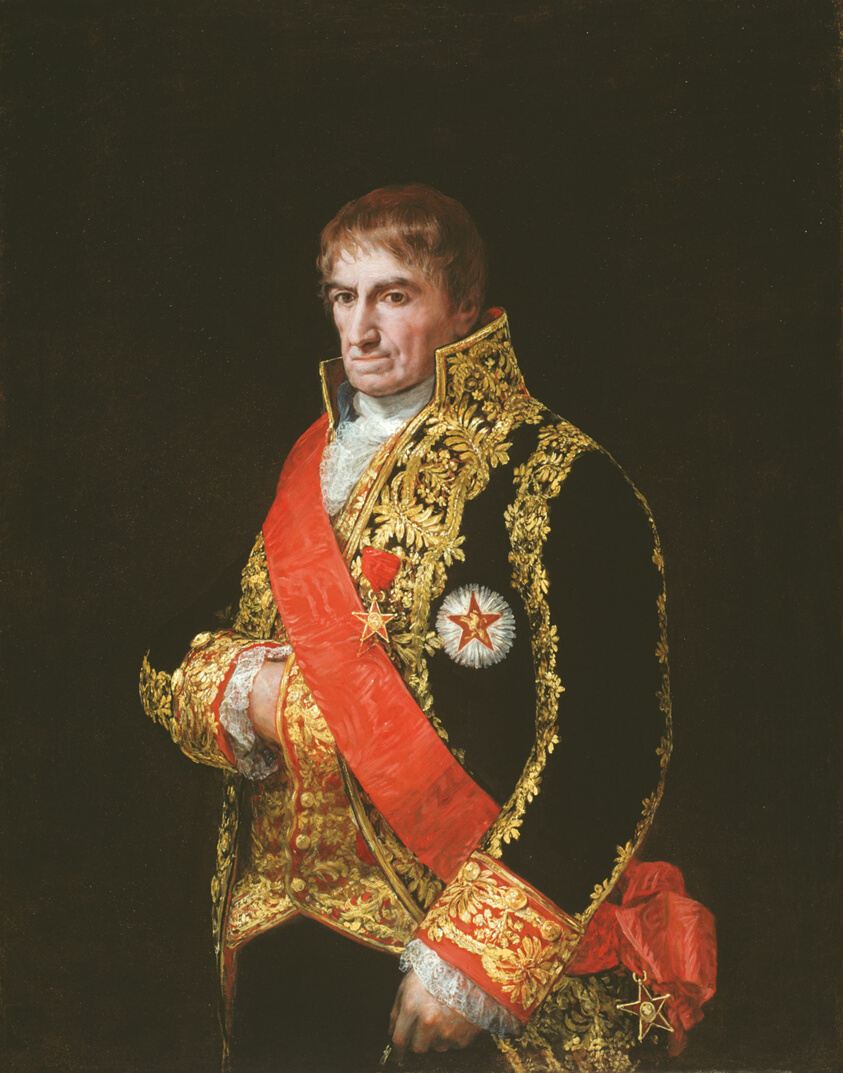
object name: Painting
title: Portrait of General José Manuel Romero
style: nineteenth century, 19th century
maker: Francisco José de Goya y Lucientes (Spanish, 1746–1828)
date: c. 1810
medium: Oil on canvas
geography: Spain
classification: painting; oil on canvas; oil paintings (visual works); paint; portrait; spanish; european painting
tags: portraits: Spanish subject, decoration, generals, gold (color), lace, man, medals, military, portrait, portraits, portraits: male subject, red (color), regalia, uniforms